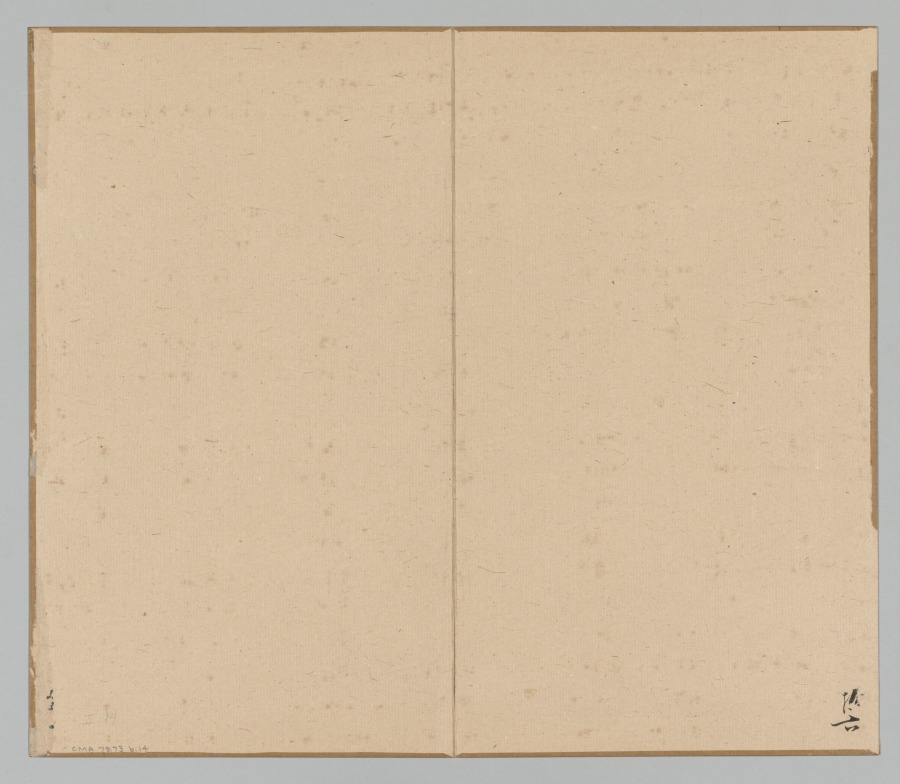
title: Reverberations of Taiga, Volume 2 (leaf 14)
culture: Japan, Edo period (1615–1868)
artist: Aoki Shukuya (Japanese, d. 1802)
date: mid- to late 1700s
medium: double-leaf from a pair of albums; ink and light color on paper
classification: Portfolio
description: Traditionally, young painters in Japan began their studies with an established master-painter. The master's compositions invariably became models that the apprentice copied to learn various ink and brush techniques. Shukuya was a pupil of the famous Kyoto artist Ikeno Taiga, whose style is reflected in these sketches of rocks, trees, and mountains.